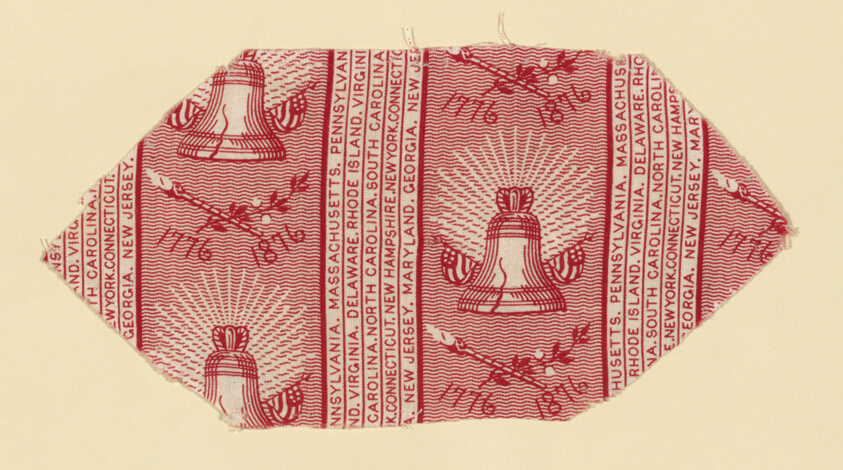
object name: Textile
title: Fragment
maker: United States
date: 1876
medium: Cotton, plain weave; roller printed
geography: United States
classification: textile; weaving - printed; furnishing textile